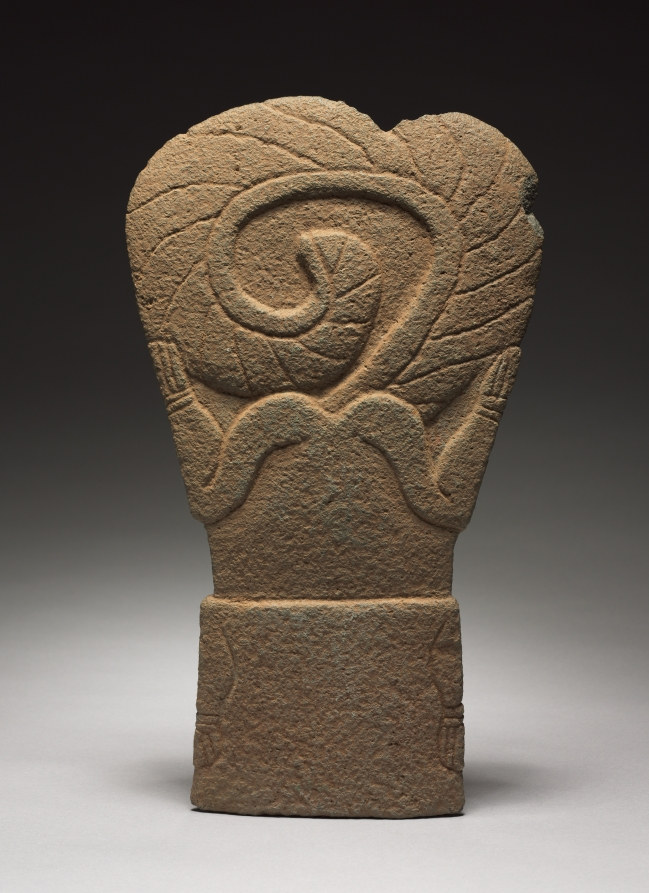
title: Ballgame Palma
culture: Mexico, Gulf Coast, Classic Veracruz style (600-1100)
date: 900–1100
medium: stone, pigment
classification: Sculpture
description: Stone palmas, so-called today for their palm-frond-like shape, are ceremonial sculptures that may replicate lightweight gear worn over the chest during the ballgame. Palma imagery is not well-studied and the meaning of the caiman (New World alligator) carved on both sides of this example is unknown. The tail is beautifully adapted to the palma's curved upper edge.